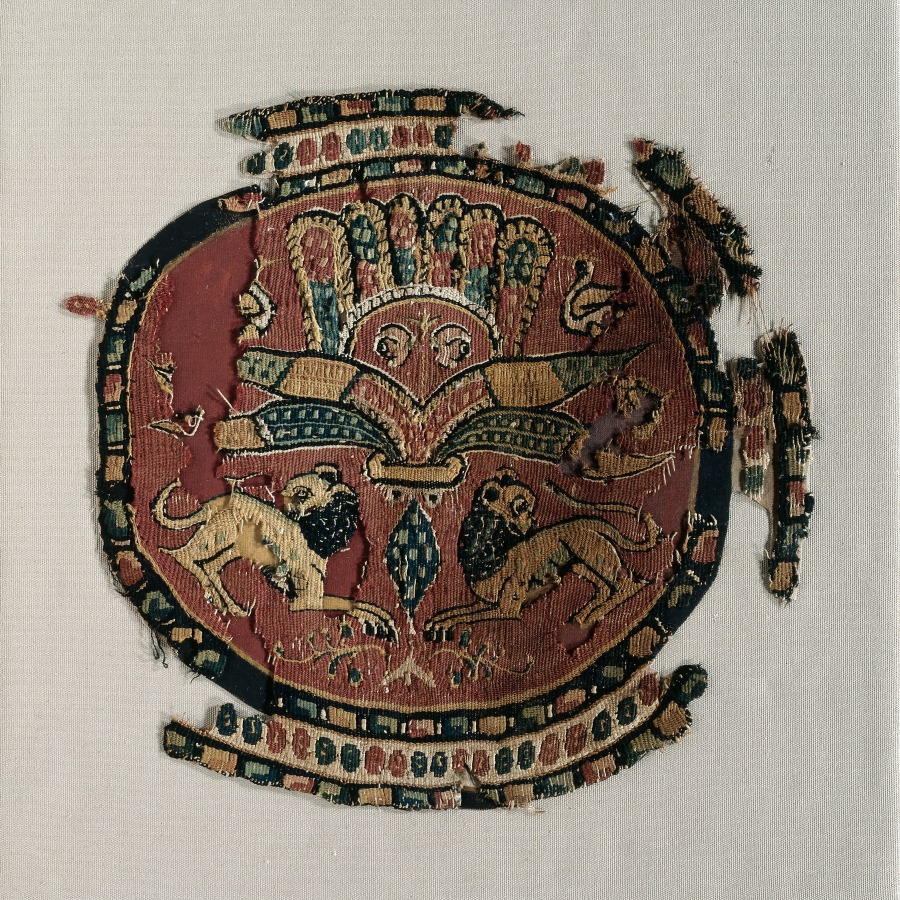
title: Lions from a Tunic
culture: Egypt, Islamic Abbasid period, 8th - 9th Century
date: c. 800's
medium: tapestry weave with supplementary weft wrapping; undyed linen and dyed wool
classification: Textile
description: The royal lions and jeweled border in this colorful roundel, originally from a tunic, conveyed power and wealth. The symmetrical design with lions and ducks flanking the central palmette (fan-shaped plant form) indicates that the pattern was copied from a costlier silk textile woven on a loom that automatically repeated the design in mirror-image symmetry.